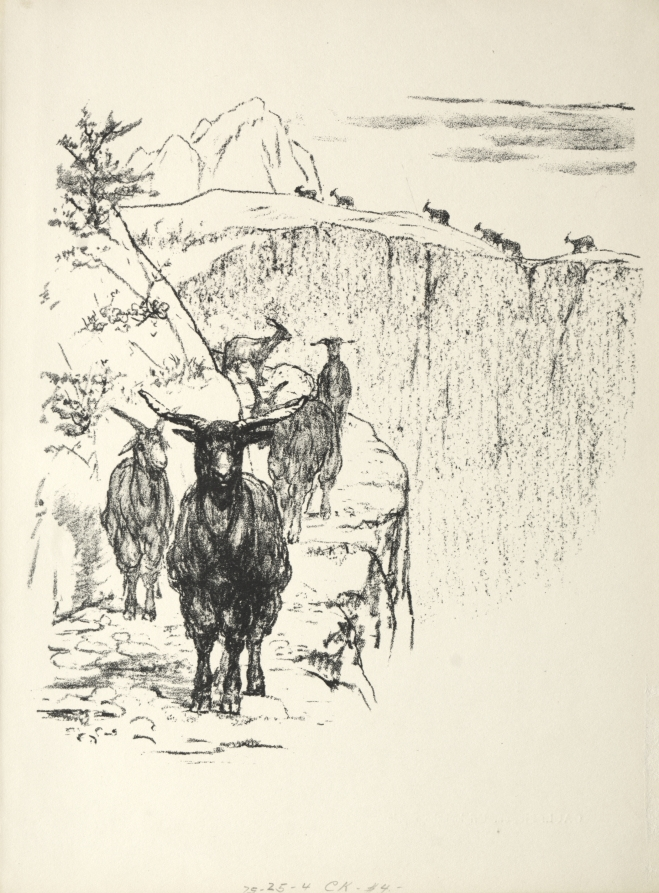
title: Goats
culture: Germany, 20th century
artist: August Gaul (German, 1869–1921)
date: c. 1889–1921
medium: lithograph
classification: Print